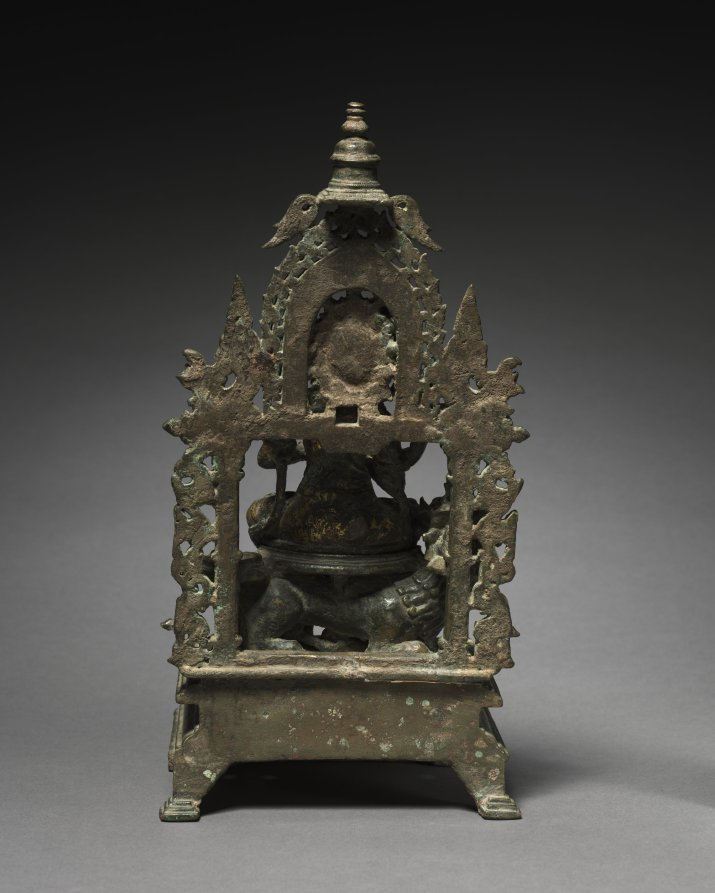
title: Bodhisattva Manjushri: Lord of Wisdom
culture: East India, Bengal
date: 1000s–1100s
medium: Bronze with gilding and inlay of semiprecious stones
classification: Sculpture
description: The Bodhisattva of Wisdom can be identified by the lion mount, the horizontal palm-leaf manuscript on the lotus above his left shoulder, and the stupa above his head. His seat and footrests are lotus flowers, indicating transcendence of the ordinary world.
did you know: His hand gestures show that he teaches the wisdom that leads to enlightenment.